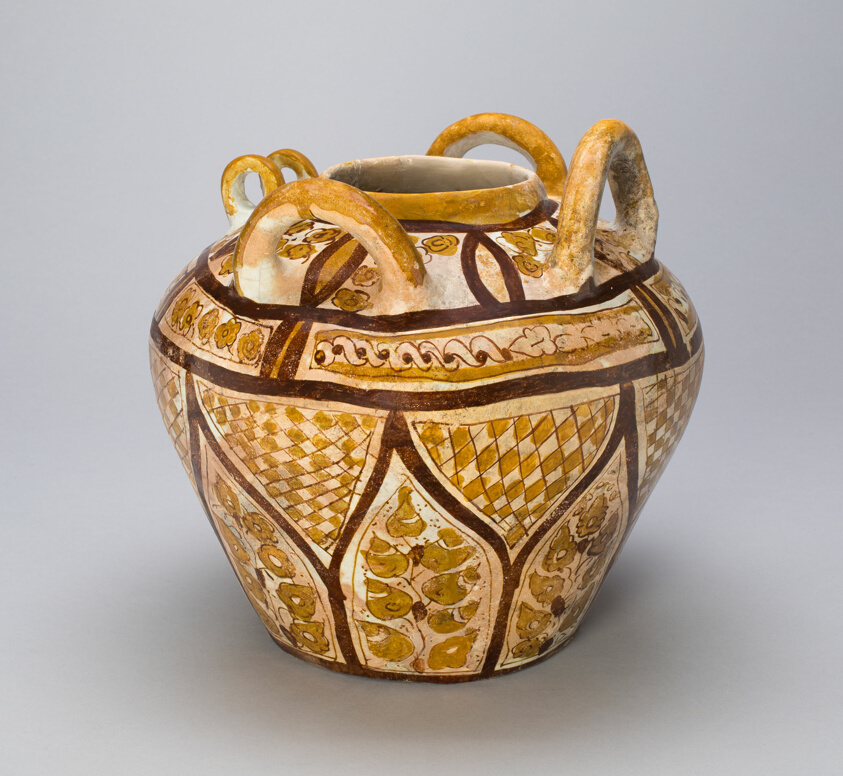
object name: Ceramics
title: Jar with Floral and Geometric Design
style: fostat, fatimid, Islamic (culture or style)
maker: Iraq; Samarra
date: Abbasid Caliphate (750–1258), 9th century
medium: Earthenware oainted in luster with overglaze decoration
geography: Mesopotamia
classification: ceramics; fragment; asian art; vessel